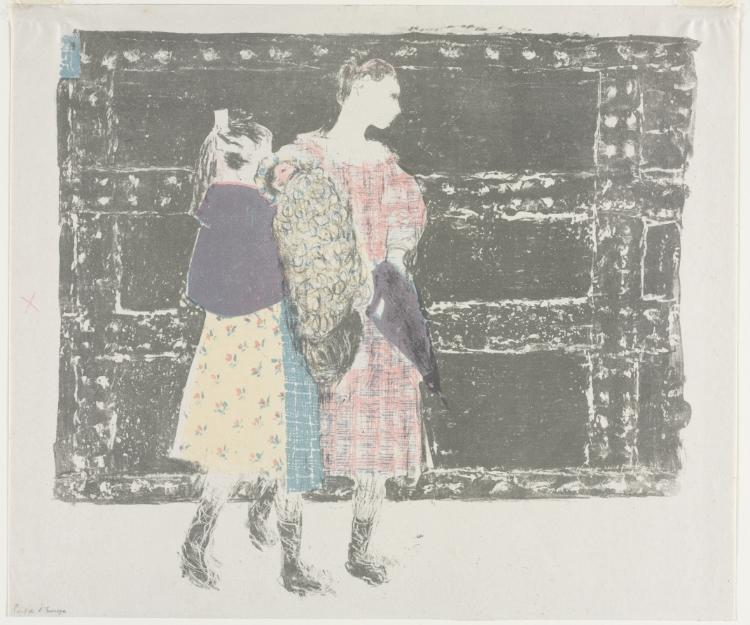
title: On the Pont de l'Europe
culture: France, 19th century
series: Landscapes and Interiors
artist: Édouard Vuillard (French, 1868–1940)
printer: Auguste Clot (French, 1858–1936)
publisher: Ambroise Vollard (French, 1867–1939)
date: 1899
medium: color lithograph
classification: Print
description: The Pont de l’Europe, a massive iron bridge built between 1865 and 1869, provided easy access to the expanded Gare Saint-Lazare railway station. Vuillard depicts this quintessential symbol of Parisian modernity with a decorative design of crisscrossing railings. The pattern is reminiscent of the wallpaper and textiles in the artist’s paintings of interiors throughout the 1890s, such as those on view in the first two galleries of this exhibition. In his own witty and highly personal manner, Vuillard domesticized one of the capital’s most important landmarks and technologically modern feats.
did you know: A popular scene among French Impressionists, Le Pont de l’Europe is also depicted in paintings by Gustave Caillebotte, Édouard Manet, and Claude Monet.